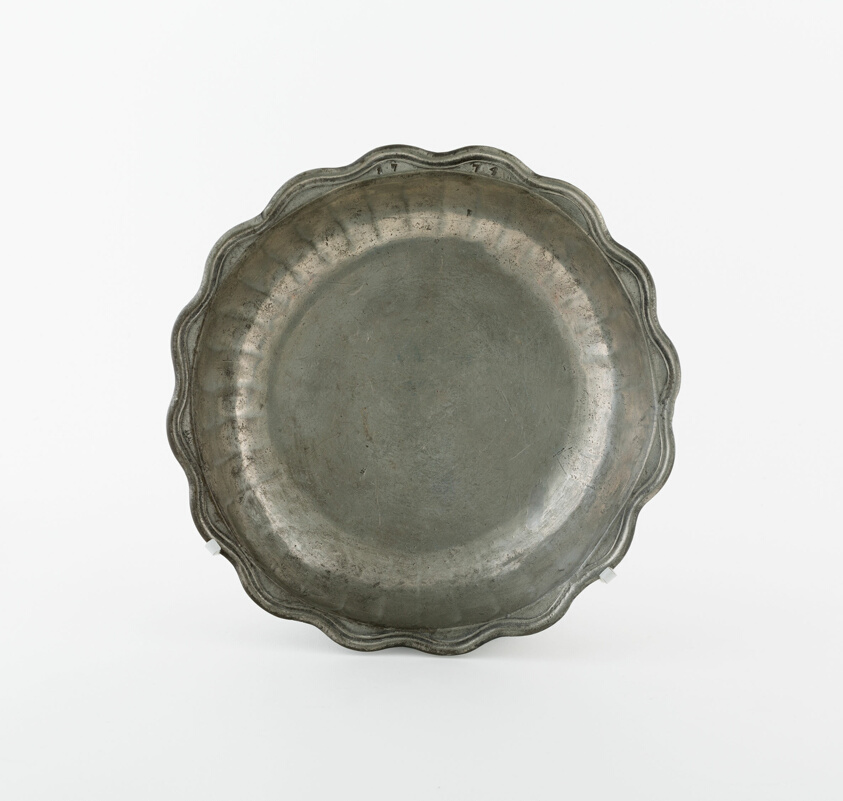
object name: Metalwork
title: Bowl with Scalloped Edge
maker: Possibly France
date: 1774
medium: Pewter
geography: France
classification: bowl; pewter; dish (vessel); metalwork; european decorative arts